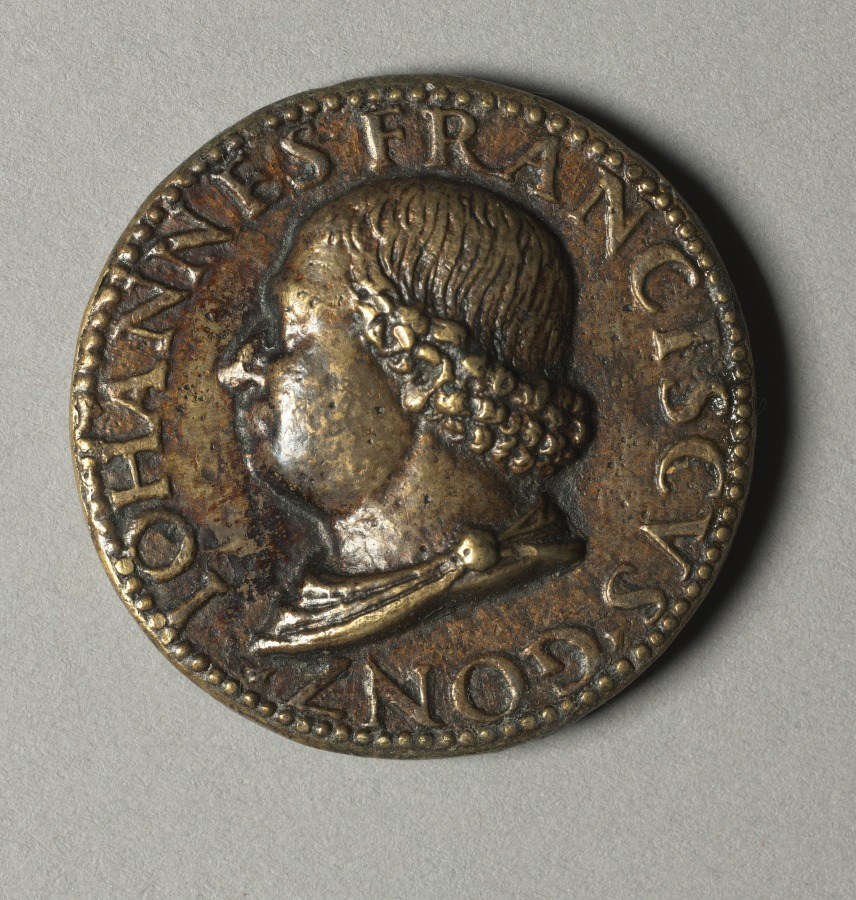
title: Portrait of John VIII Palaoelogus, Emperor of Constantinople, 1424-1428 (obverse) and (reverse)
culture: Italy, 15th century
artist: Pisanello (Italian, Ferrara, c. 1395–1455)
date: c. 1438–39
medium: lead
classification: Sculpture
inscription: obverse: IWANNHC BACI EVC KAI AVTOKPATWP PWMAIWN O A AIOA O OC [John King and Emperor of the Romans, Palaeologus]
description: The art of the medal was introduced into Italy by Pisanello, His work as a medalist began with the portrait medal of this emperor, who, in 1438, visited the Council of Ferrara.